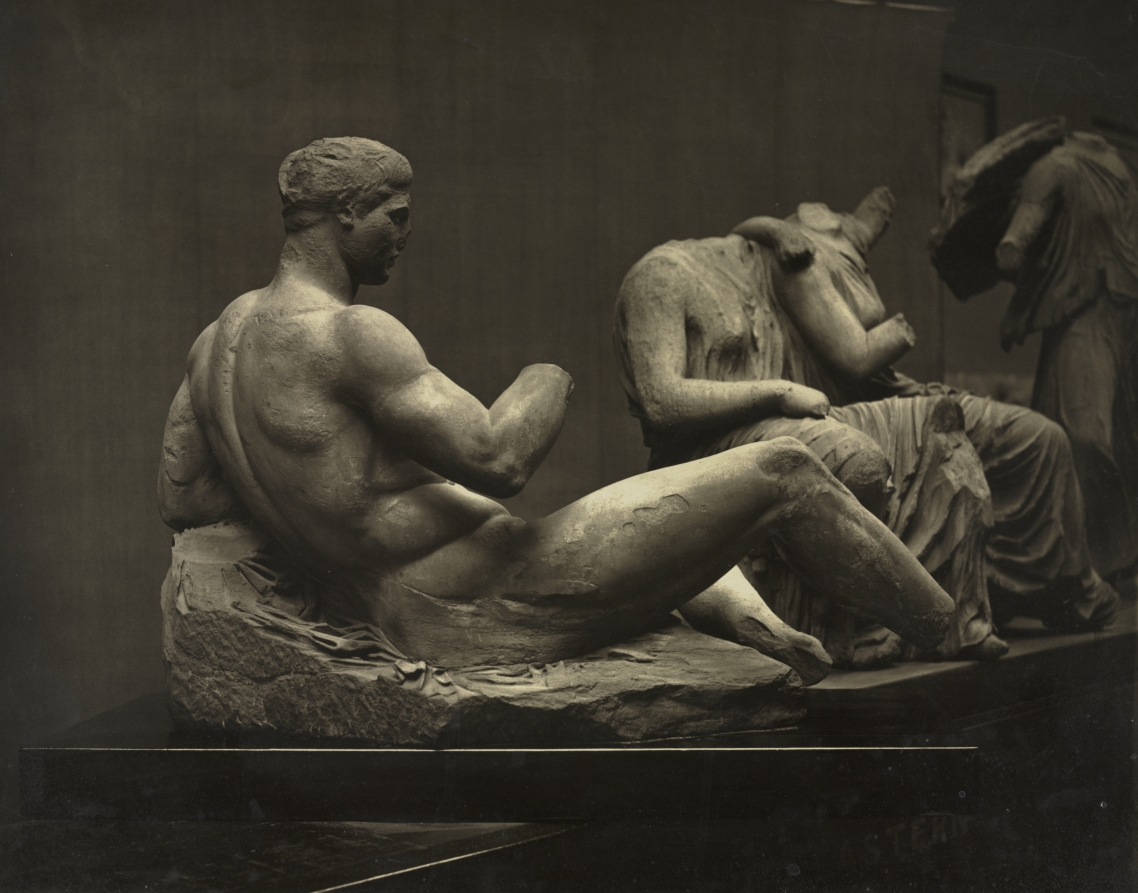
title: Sculptures from the Parthenon, British Museum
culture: France, 19th century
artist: Adolphe Braun (French, 1812–1877)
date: c. 1870s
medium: carbon print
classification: Photograph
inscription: written in purple ink on verso: "Fronbon or Froulon(?) on Partheion - (Londres?)